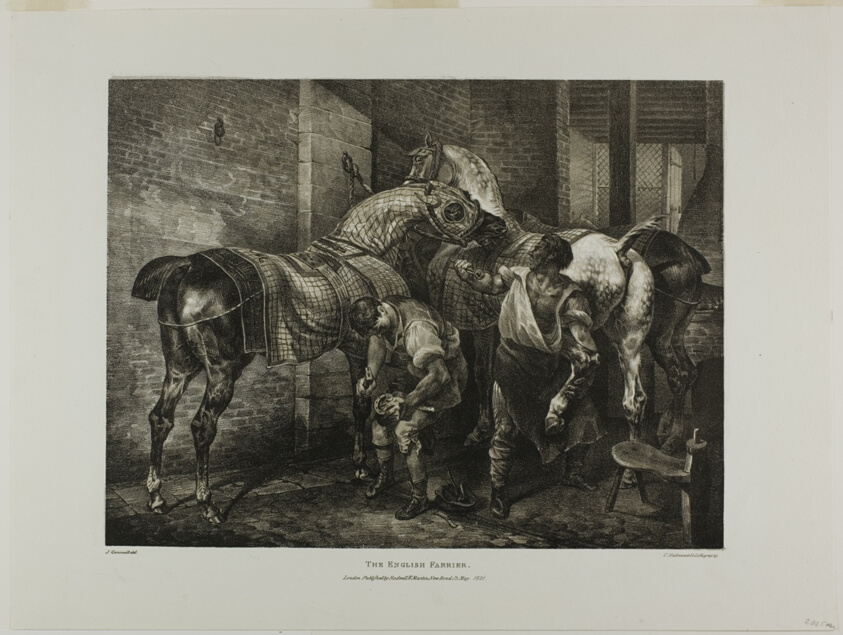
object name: Print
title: The English Farrier, plate 10 from Various Subjects Drawn from Life and on Stone (The English Suite)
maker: Jean Louis André Théodore Géricault (French, 1791-1824); printed by Charles Joseph Hullmandel (German and English, 1789-1850); published by Rodwell and Martin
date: May 1821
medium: Lithograph in black with gray-green tint stone on ivory wove paper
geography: France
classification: lithograph; print; prints and drawing